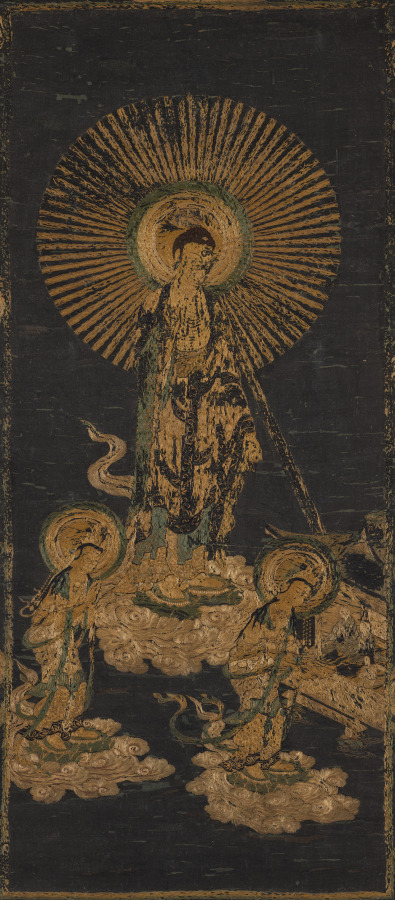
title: Embroidered Welcoming Descent of Amida Triad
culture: Japan, Muromachi period (1392–1573)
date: 1400s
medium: Hanging scroll; silk and human hair embroidery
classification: Embroidery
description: The Buddha Amida arrives here to welcome a person to his Pure Land at the moment of death. A monk, a woman, and a child sit with their hands in prayer, and a beam of light emanating from Amida extends toward them. The inscription at the top indicates that the compassion of Amida Buddha always flows impartially to all those who recite his name, a quote from the Contemplation Sutra.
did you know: The Contemplation Sutra is a sacred Buddhist text often used in Pure Land Buddhism.